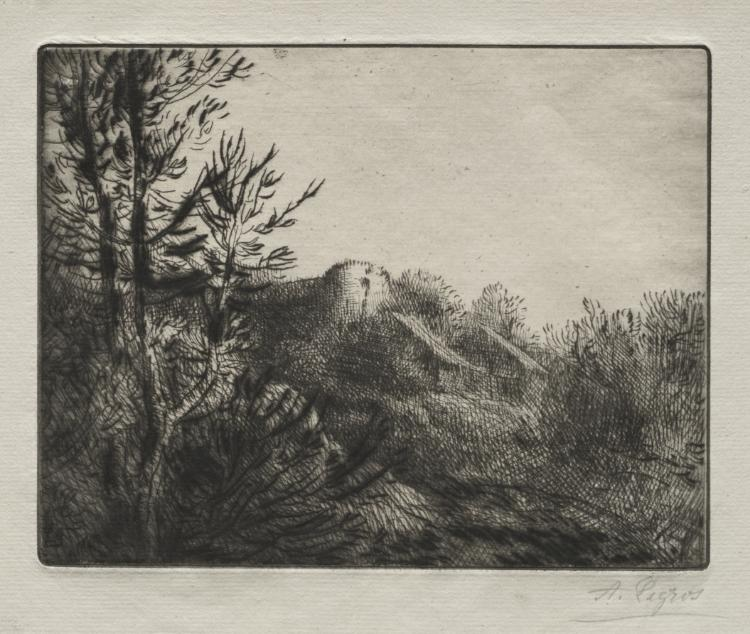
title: La ferme de valoux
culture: France, 19th-20th century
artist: Alphonse Legros (French, 1837–1911)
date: c. 1857–1911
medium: etching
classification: Print